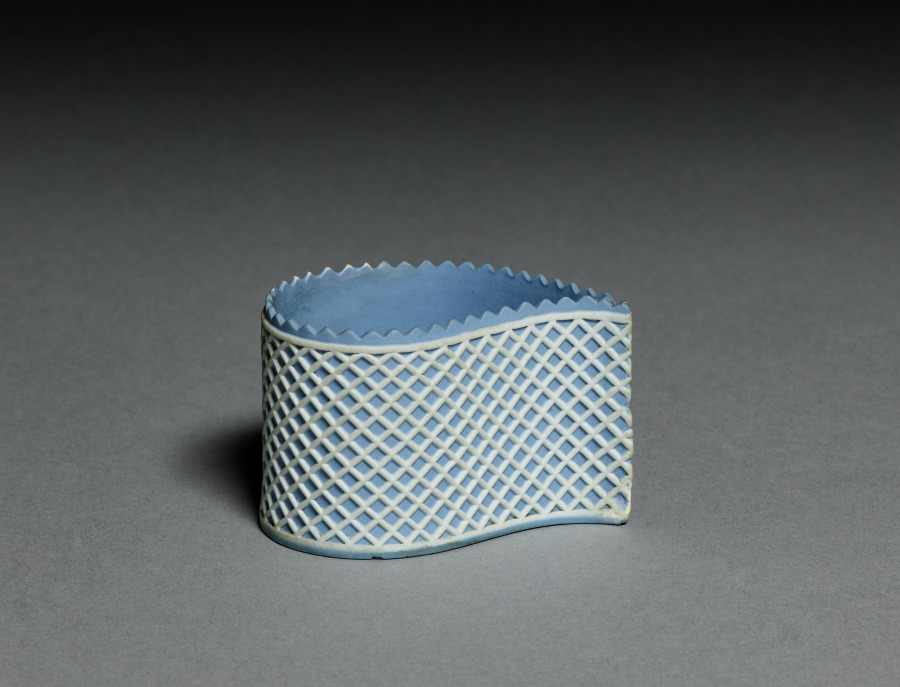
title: Custard Cup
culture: England, Staffordshire, 18th century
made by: Wedgwood Factory (British)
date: c. 1785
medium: jasper ware with relief decoration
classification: Ceramic